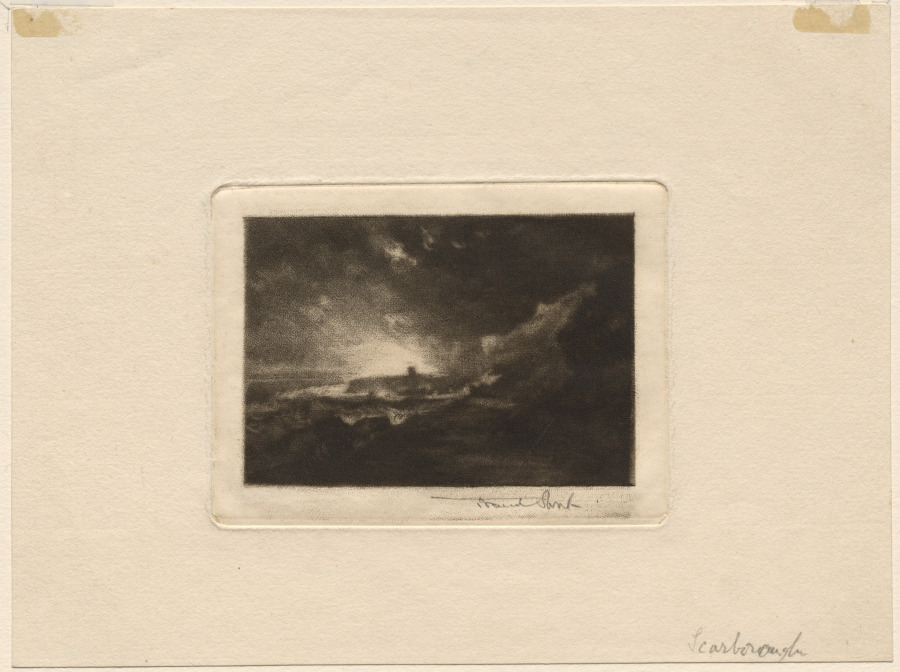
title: Scarborough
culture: England, 19th century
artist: Frank Short (British, 1857–1945)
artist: after J.B. Carter (British)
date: 1884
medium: mezzotint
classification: Print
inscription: Below image, in graphite: Frank Short; lower right corner: Scarborough